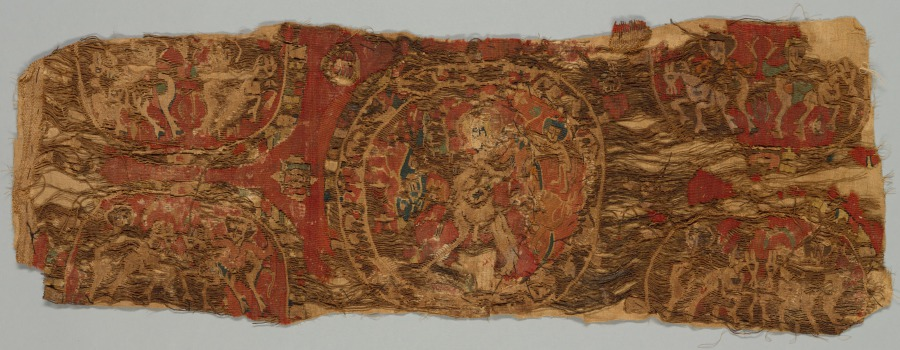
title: Fragment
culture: Egypt, Byzantine period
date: 500s - 600s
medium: tapestry weave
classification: Textile